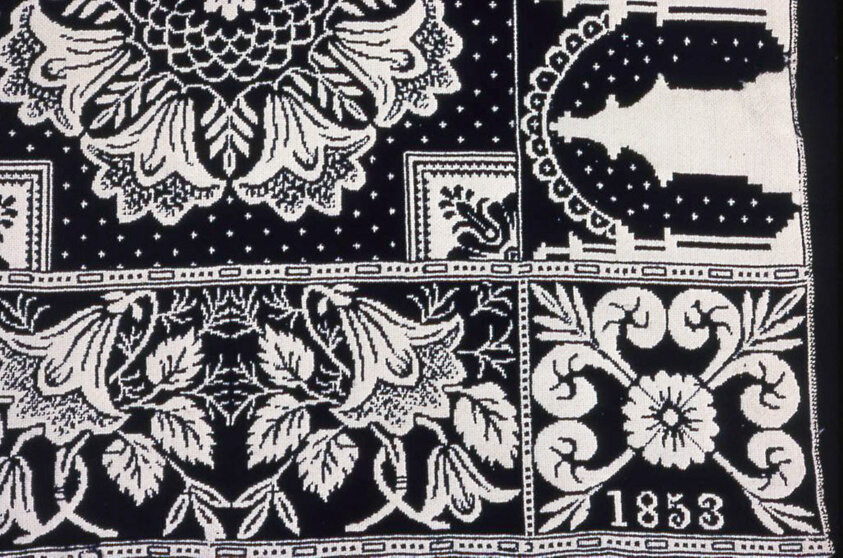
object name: Textile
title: Coverlet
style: 19th century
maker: John Rogers (American, born Irish, active c. 1853); United States, Indiana, Wayne County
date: 1853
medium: Cotton and wool, plain weave double cloth; woven on loom with Jacquard attachment; two loom widths joined; fringed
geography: Indiana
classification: weaving - coverlet; coverlet; weaving; textile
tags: medallions, rectangles, foliage, scalloping, buildings, floral motifs, flowers, squares, coverlet